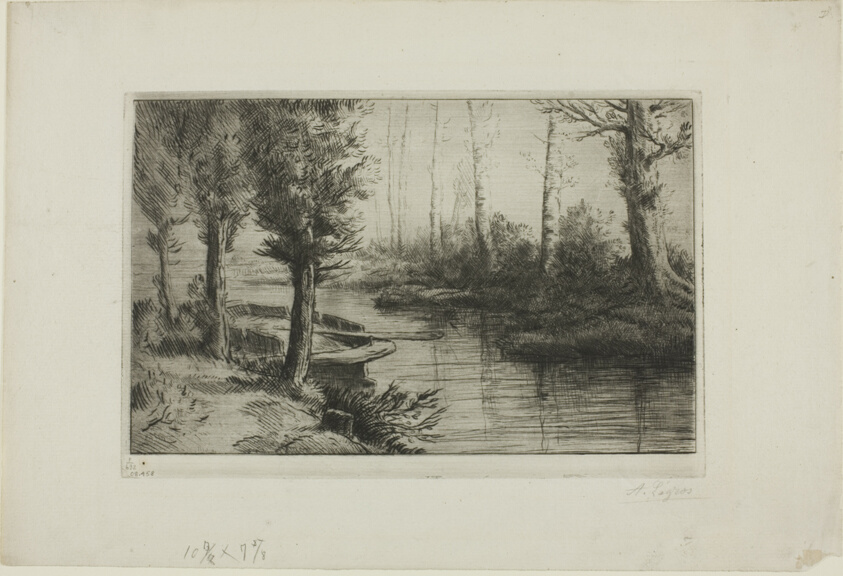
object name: Print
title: The Canal: Morning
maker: Alphonse Legros (French, 1837-1911)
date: c. 1877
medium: Etching and drypoint on light gray laid paper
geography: France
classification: etching; print; prints and drawing